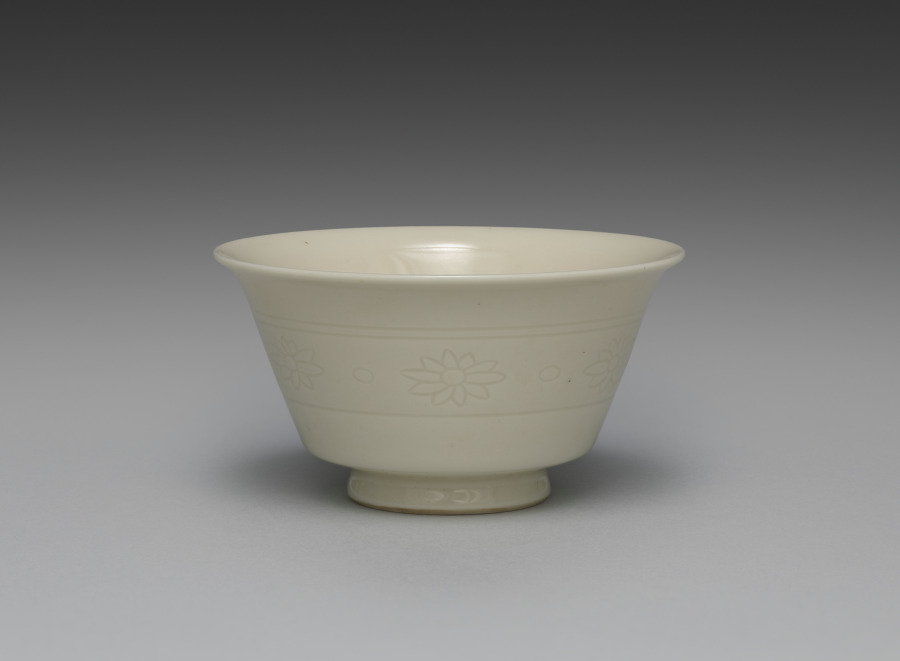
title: Teacup from Teacups with Floral Band Motif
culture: Japan, Meiji period (1868–1912)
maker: Seifū Yohei III (Japanese, 1851–1914)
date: 1893–1914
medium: One from a set of five cups; porcelain with incised decoration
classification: Ceramic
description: The five sencha teacups in this set are decorated with incised flowers and dots between a double band at the top and a single band at the bottom. They are in Yohei III’s creamy taihakuji body and glaze. In their motifs, they are quite similar to an incense burner by Yohei III (see CMA 2022.180), but the flowers are even more simple in design, with no open circle at the center. A label affixed to the side of the box refers to them as “sencha cups in emulation of Korean white [ware].” The reference to Korean ware indicates that even though Yohei was more directly inspired by Qing dynasty wares from the Dehua kilns in Fujian Province in developing his porcelain clay and glaze for works such as these, the general understanding of the continental models still placed them, at least in terms of color, among pieces broadly associated in Japan with Korean white wares. The delicate cups are thinly potted, so they have a highly desirable translucency.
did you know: The delicate cups in this set are thinly potted, so they have a highly desirable translucency.